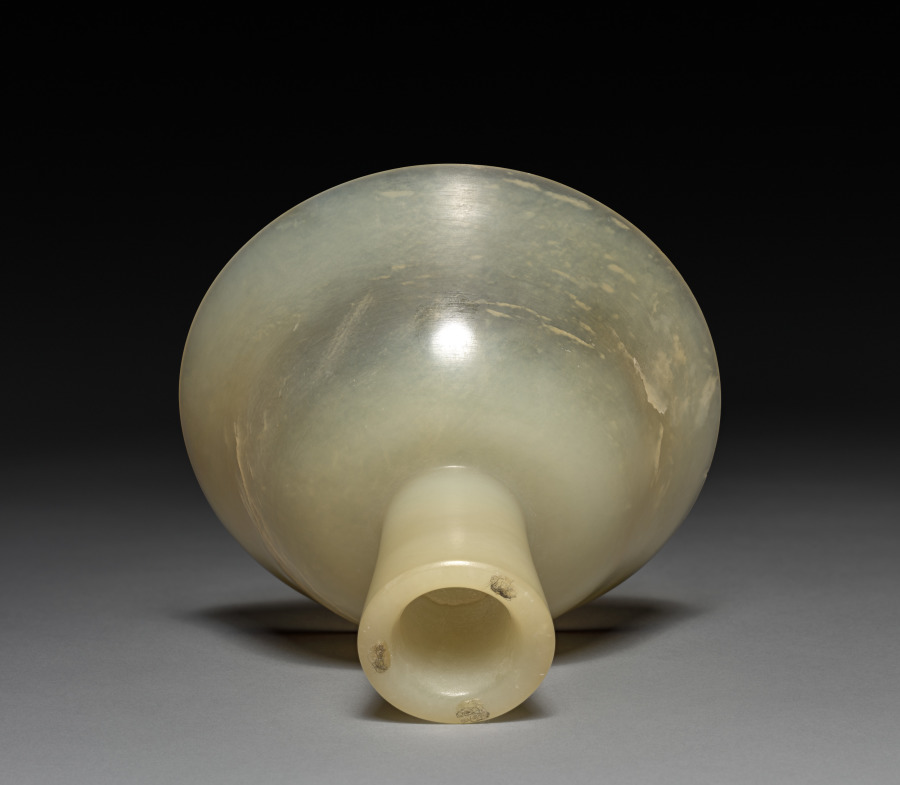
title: Stem Cup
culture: China, Ming dynasty (1368–1644)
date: 1368–1644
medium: white jade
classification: Jade